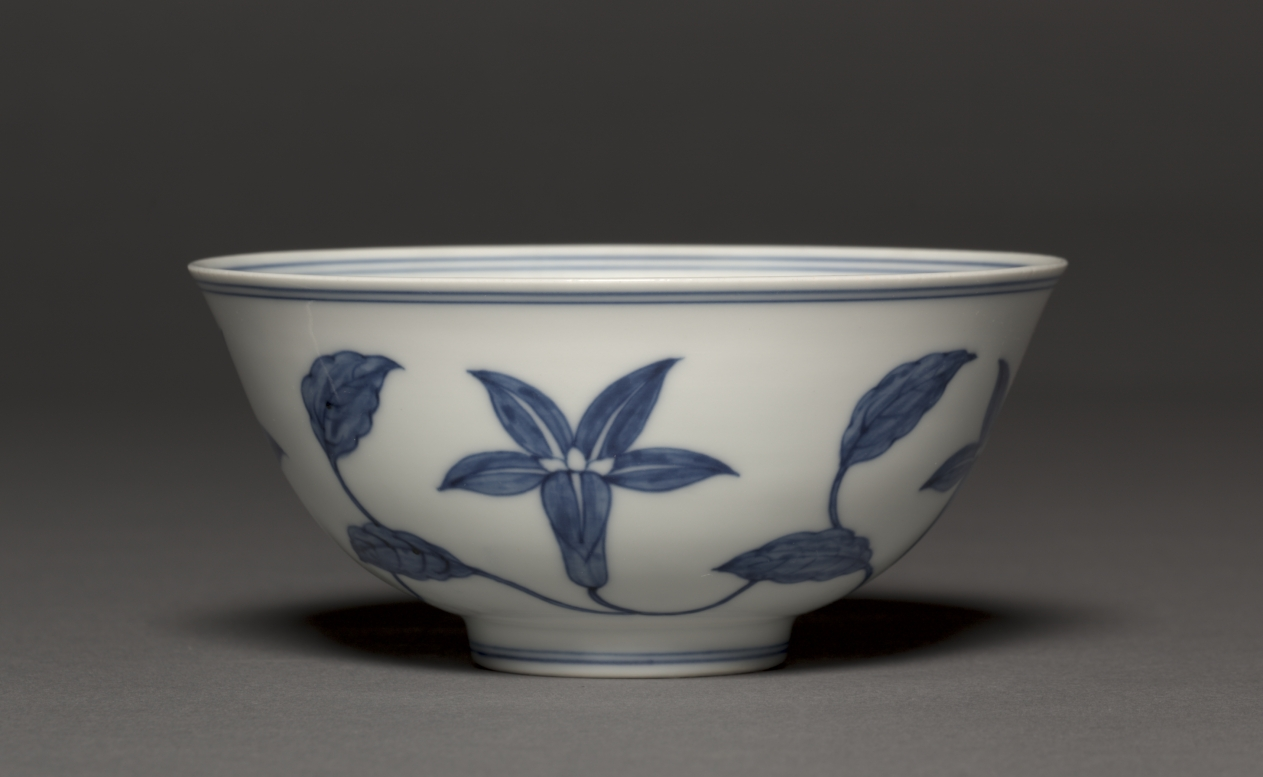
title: Bowl with Lily Scrolls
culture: China, Jiangxi province, Jingdezhen, Ming dynasty (1368–1644), Chenghua mark and period (1465–87)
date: 1465–87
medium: porcelain with underglaze blue decoration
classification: Ceramic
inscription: 大明成化年製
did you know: Gently curving arabesque scrolls of lilies and leaves decorate the inside and outside of this bowl.